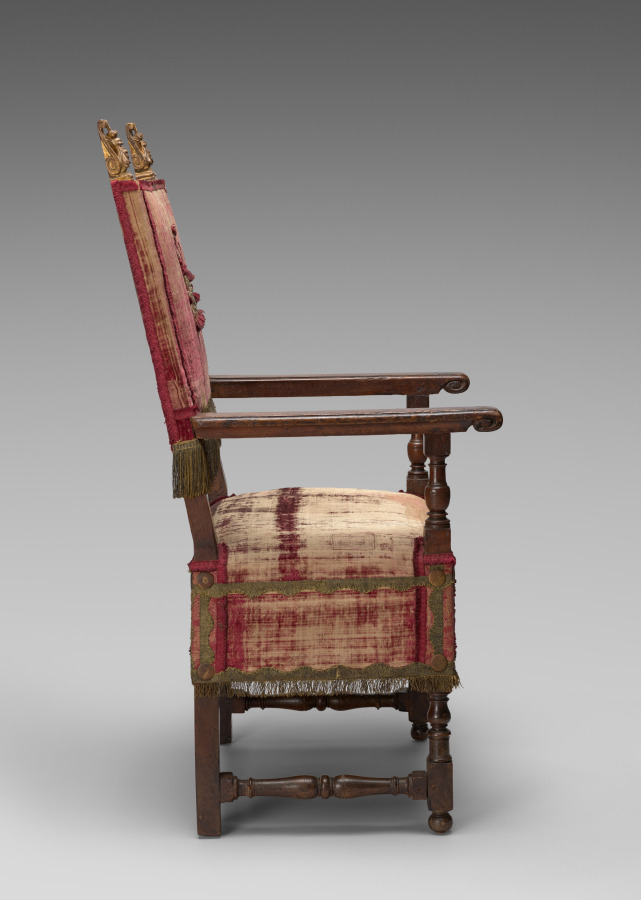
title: Armchair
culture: Italy, 17th century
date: 1600s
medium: walnut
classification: Furniture and woodwork